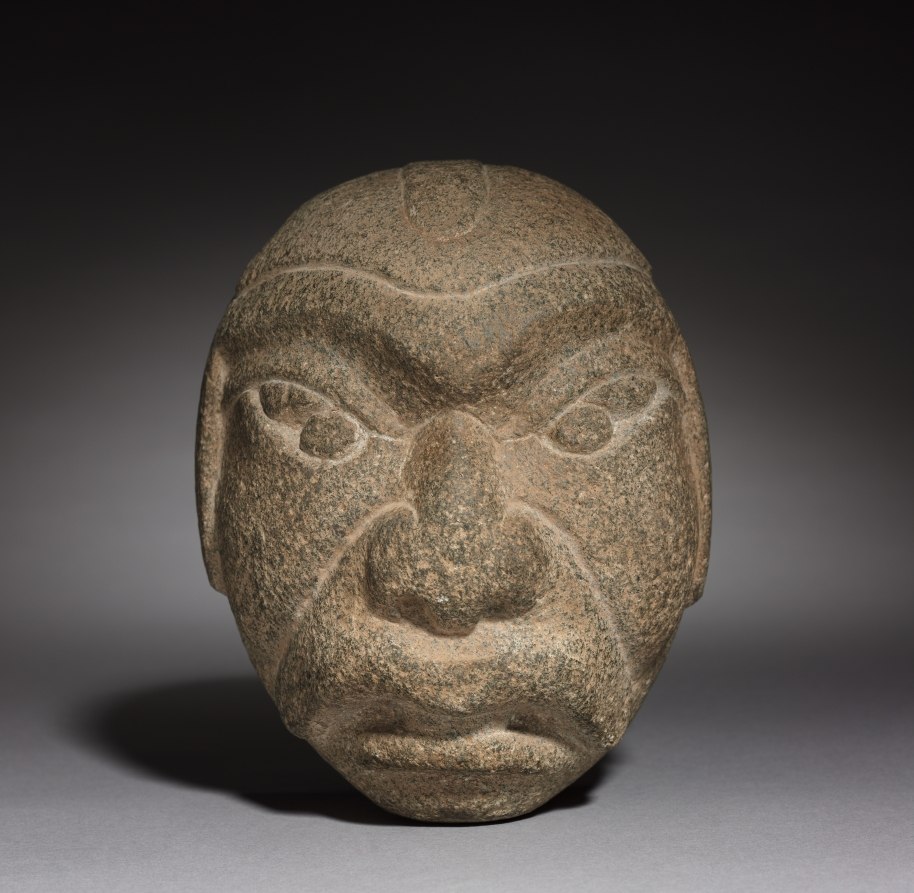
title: Head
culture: Mesoamerica, Mexico, Olmec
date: 1200–300 BCE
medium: stone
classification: Sculpture